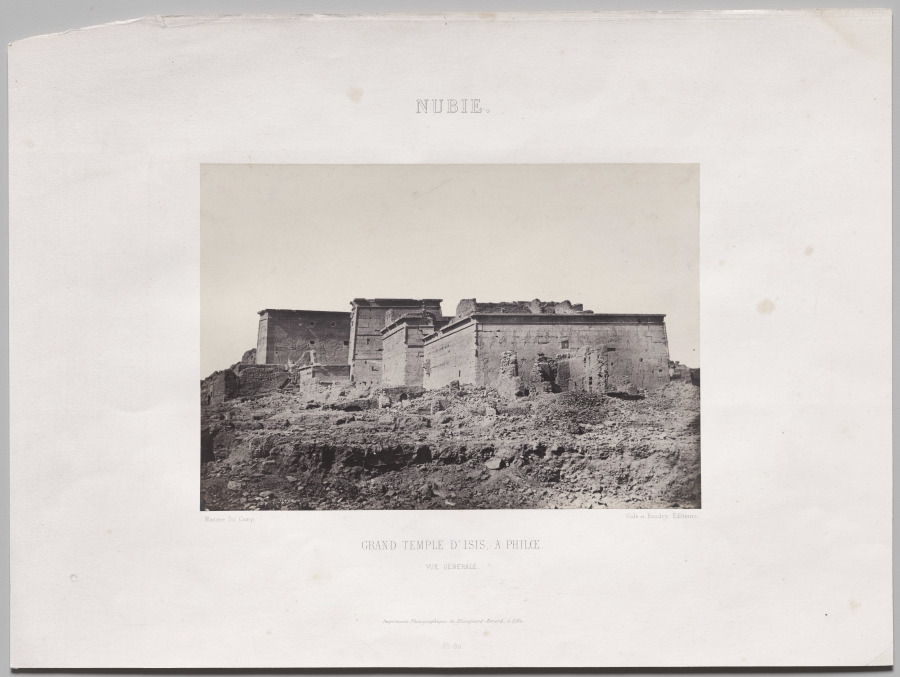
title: Grand Temple D’Isis, à Philoe (vue générale prise du nord), Nubie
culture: France, 19th century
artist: Maxime Du Camp (French, 1822–1894)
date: 1850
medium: Salted paper print, Blanquart-Évrard process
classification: Photograph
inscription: Imprinted in black on recto of mount: “NUBIE”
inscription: Imprinted in black on recto of mount: “Maxime Du Camp Gide et Baudry, Editeurs.”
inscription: Imprinted in black on recto of mount: “GRAND TEMPLE D’ISIS, A PHILOE/VUE GÉNÉRALE.”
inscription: Imprinted in black on recto of mount: “Imprimerie Photographique de Blaquard-Evard, a Lille.”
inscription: Imprinted in black on recto of mount: “Pl. 80”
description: The Temple of Isis at Philae (spelled Philoe by Du Camp) was built on an island 380–362 BC in the Nile. Following construction of the Lower Aswan Dam in 1902, it was reconstructed on a nearby island. This photograph by Du Camp is not only a picturesque image of historically significant ruins but also shows the temple as it looked when still in its original site.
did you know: Maxime Du Camp was the first photographer to depict the marvels of ancient Egypt.